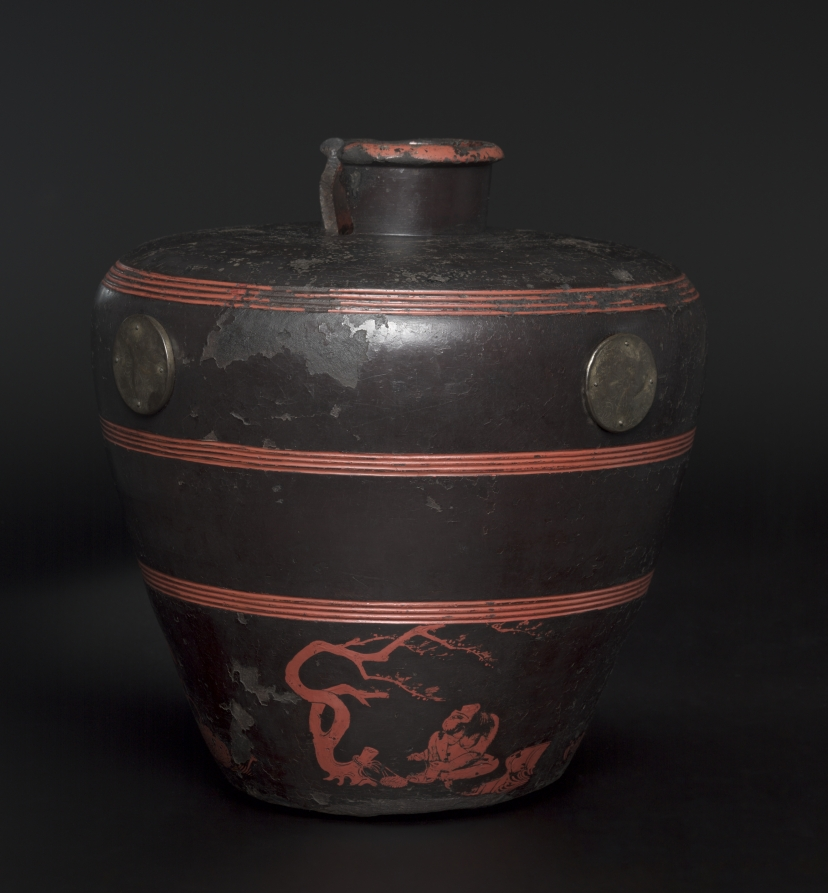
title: Jar with Scenes of Frolicking Xingxing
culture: Japan, Kamakura period (1185–1333)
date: 1302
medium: Zelkova wood, covered with hemp cloth and colored lacquer, and bronze-plated wood fittings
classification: Lacquer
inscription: Dated 1302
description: This jar features a design of a monkey-like animal ladling sake into his mouth from a vessel bobbing in waves, along with others trying on sandals and crossing a river. In the 1300s, Chinese literature was a powerful source of inspiration for artistic practice in Japan, and this scene was inspired by the exploits of the mythical xingxing, a beast of ancient Chinese lore for whom people left straw sandals and wine. The xingxing would then recite the names of the ancestors of those who had left them the gifts.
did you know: To make this vessel, a wooden form was covered with successive layers of lacquer, the clear sap of the highly toxic Rhus verniciflua tree.